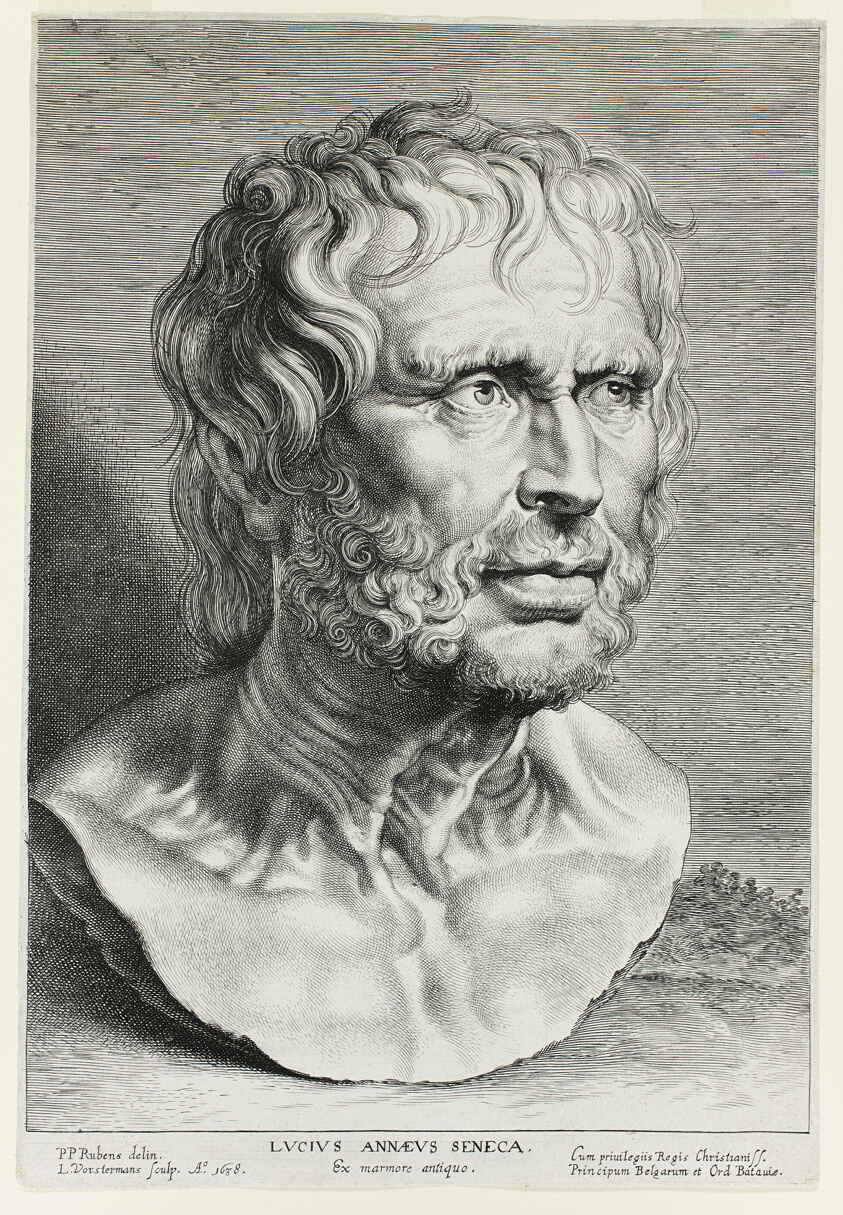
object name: Print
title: Seneca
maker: Lucas Vorsterman (Flemish, 1595-1675); after Peter Paul Rubens (Flemish, 1577–1640)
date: 1638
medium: Engraving in black on ivory laid paper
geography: Flanders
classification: engraving; paper; print; prints and drawing